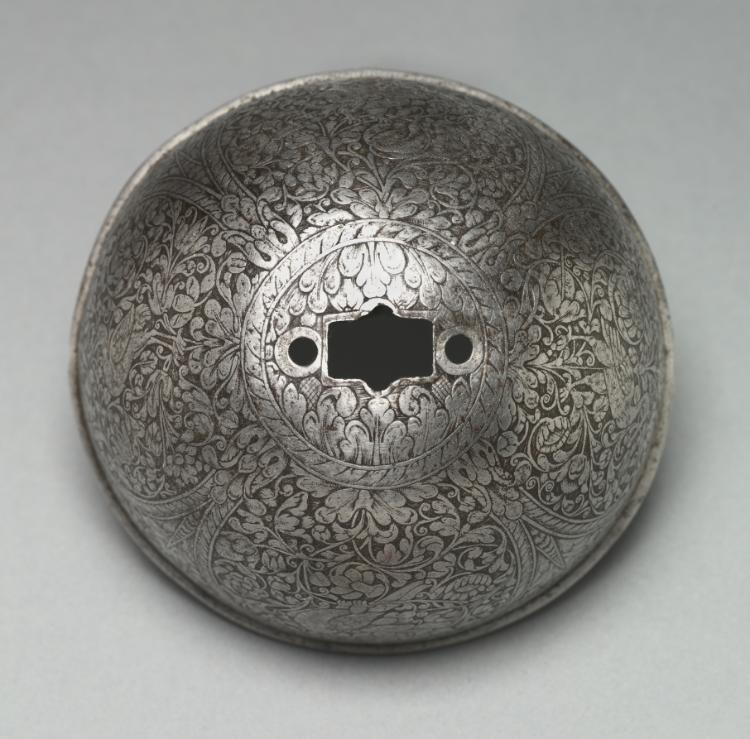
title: Cup from a Rapier's Hilt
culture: Italy, 17th century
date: c. 1650–75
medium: steel with etched floral, floiate, and bird designs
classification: Arms and Armor